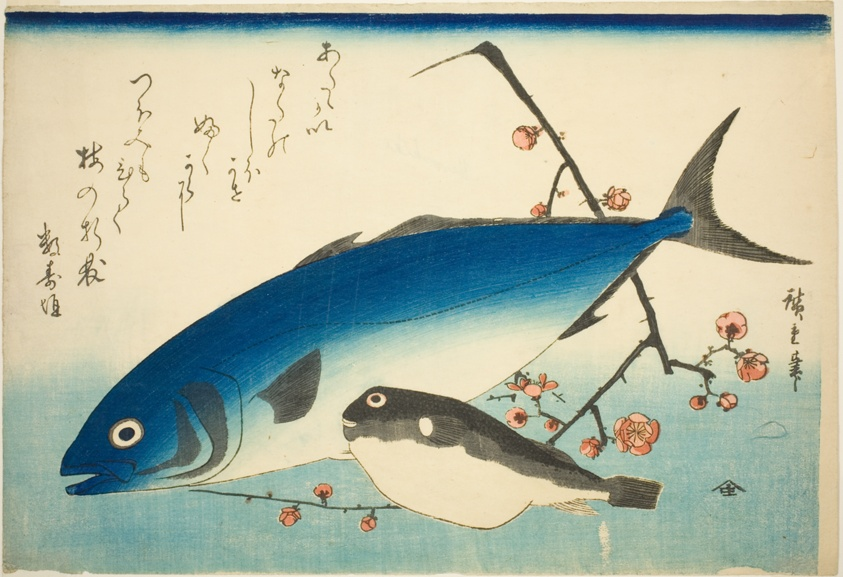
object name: Print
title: Yellowtail, blowfish, and plum branch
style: Japanese (culture or style)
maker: Utagawa Hiroshige 歌川 広重; Japanese, 1797-1858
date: c. 1840/42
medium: Color woodblock print; oban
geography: Japan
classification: woodblock print; print; asian art